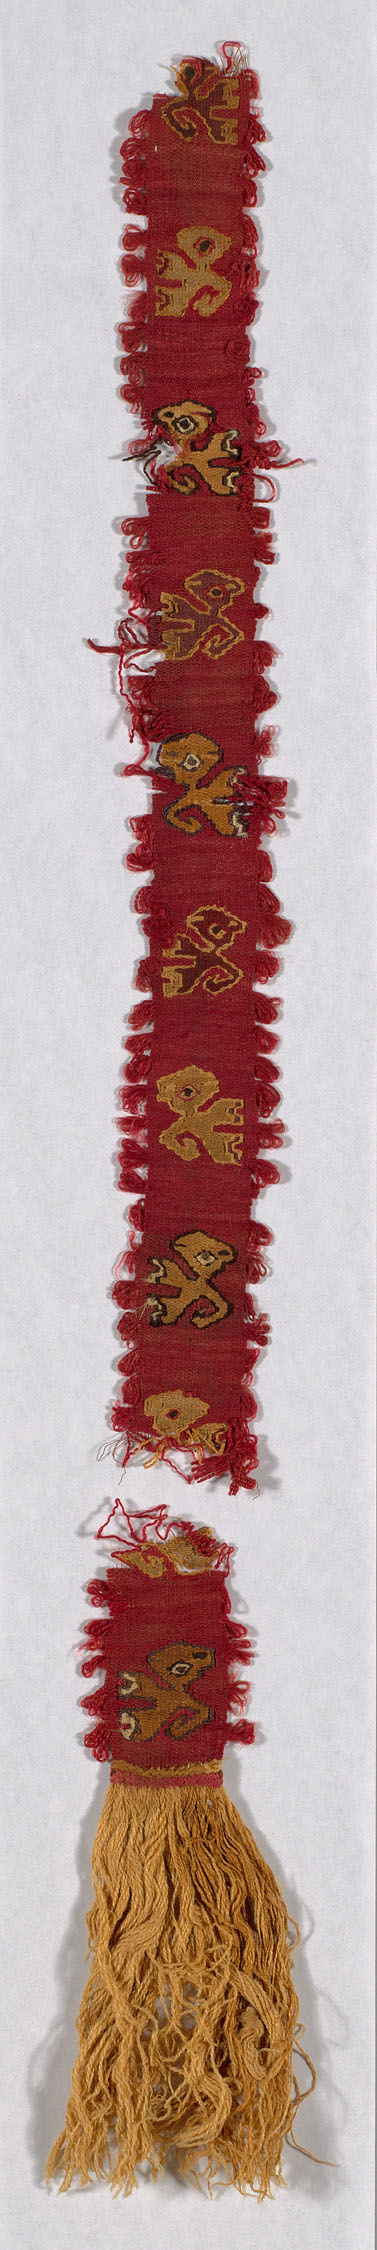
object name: Textile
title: Fragment (Band)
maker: Probably central or south coast, Peru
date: A.D. 1000/1476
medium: Slit tapestry with loops of weft forming fringe along edges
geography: Peru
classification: textile; weaving